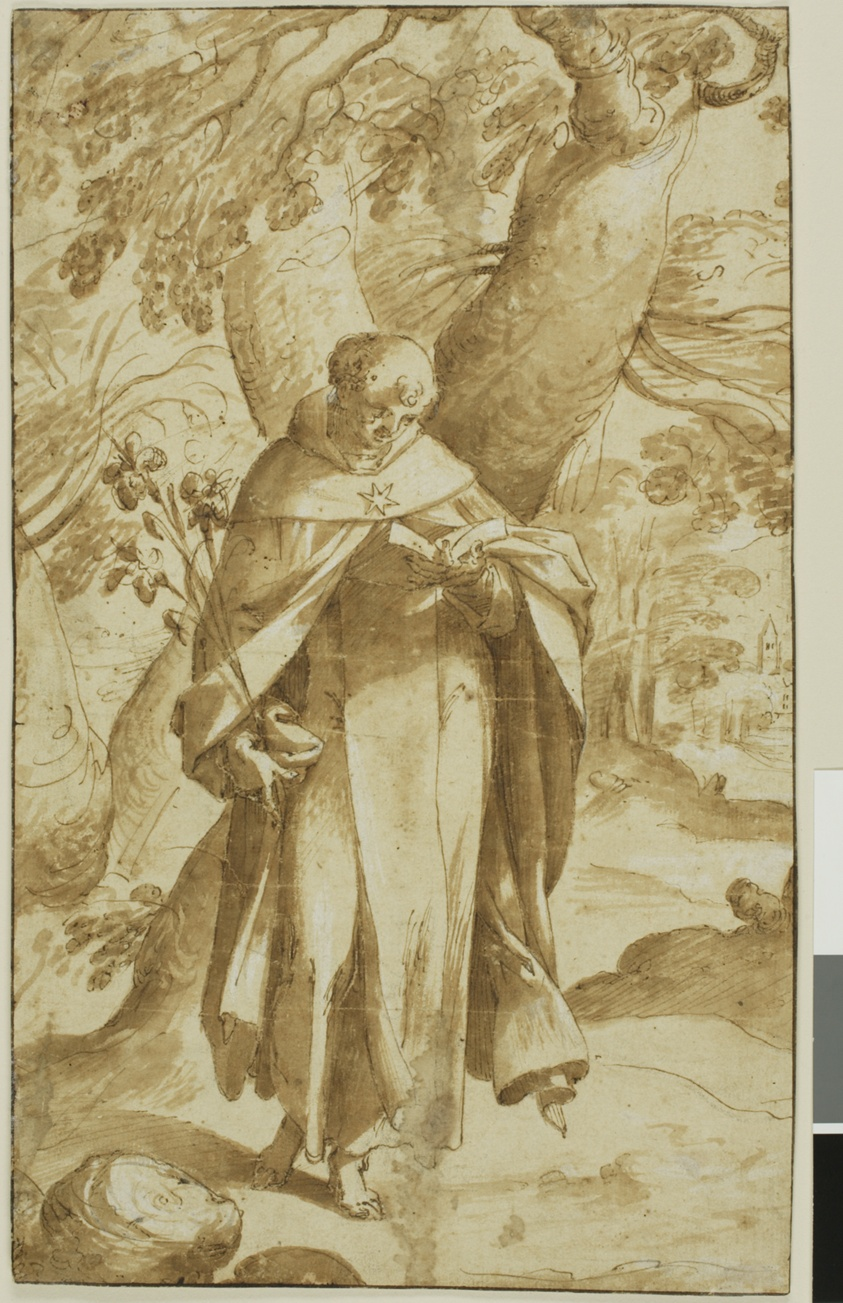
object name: Drawing and Watercolor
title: Saint Dominic Reading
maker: Bartholomaeus Spranger (Flemish, 1546-1611)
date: c. 1573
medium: Pen and brown ink and brush and brown wash, with touches of opaque white watercolor, over traces of black chalk, on cream laid paper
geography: Flanders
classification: ink; drawings (visual works); prints and drawing